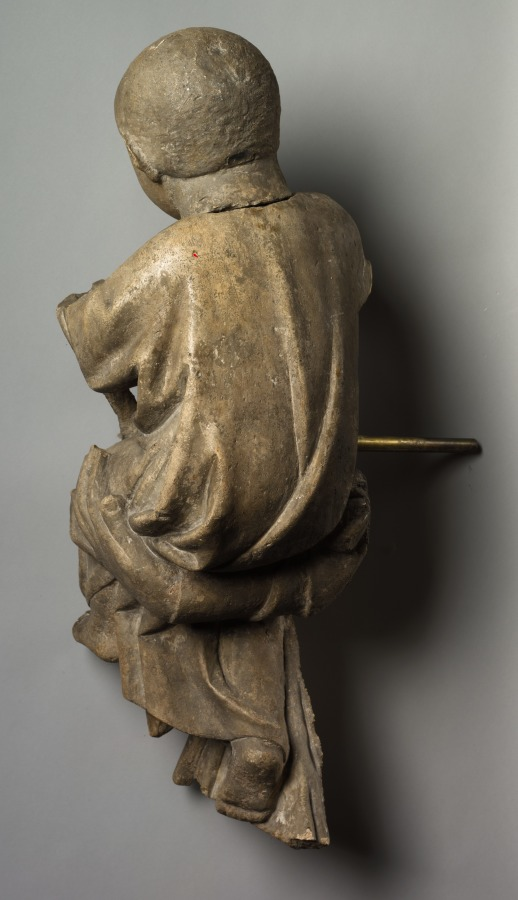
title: Figure of a Child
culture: France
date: 1300s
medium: stone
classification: Sculpture